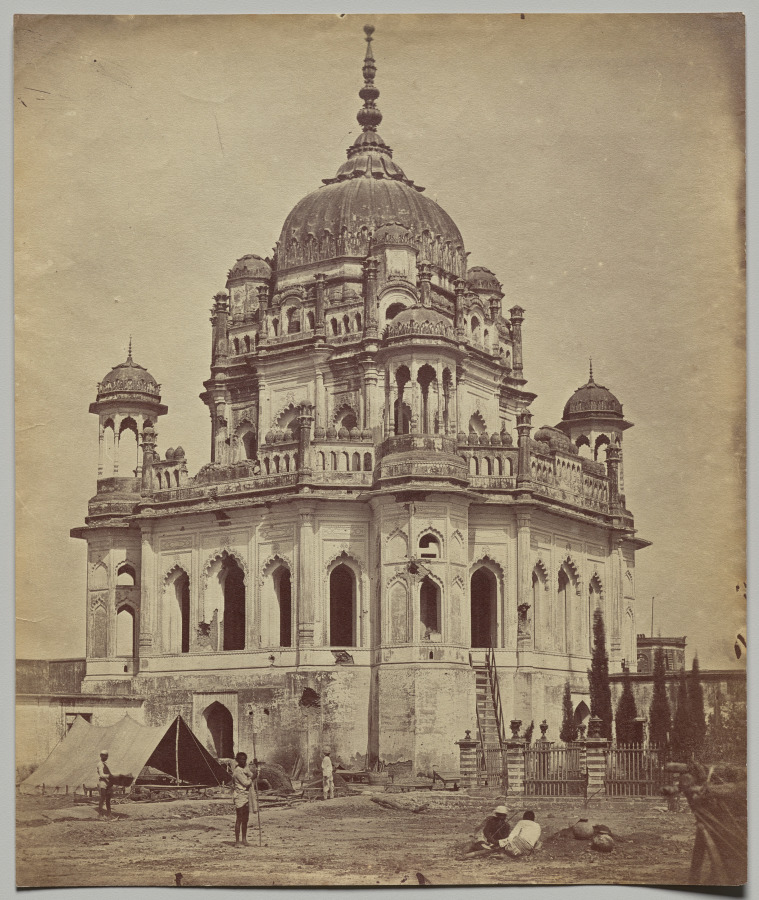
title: The Tomb of Saadat Ali in the Kaiserbagh Palace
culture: England, 19th century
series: Lucknow After the Siege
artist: Felice A. Beato (British, 1832–1909)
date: 1858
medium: albumen print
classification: Photograph